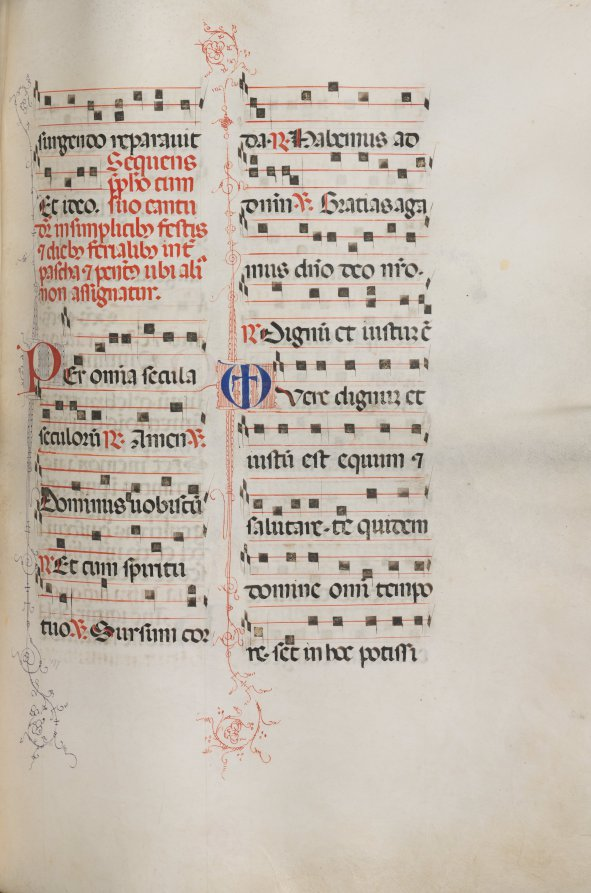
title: Missale: Fol. 179: Music for various ordinary prayers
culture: Italy, Perugia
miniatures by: Bartolommeo Caporali (Italian, c. 1420–1503)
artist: assisted by Giapeco Caporali (Italian, d. 1478)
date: 1469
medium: ink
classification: Bound Volume